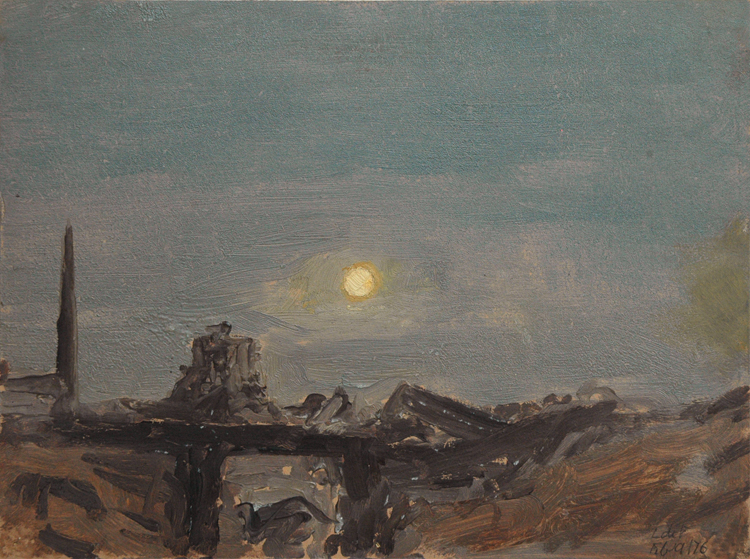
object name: Drawing and Watercolor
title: Full Moon Over Luxor Ruins, Off the Nile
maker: Lockwood de Forest (American, 1850-1932)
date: February 9, 1876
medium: Oil on card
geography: United States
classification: drawings (visual works); prints and drawing